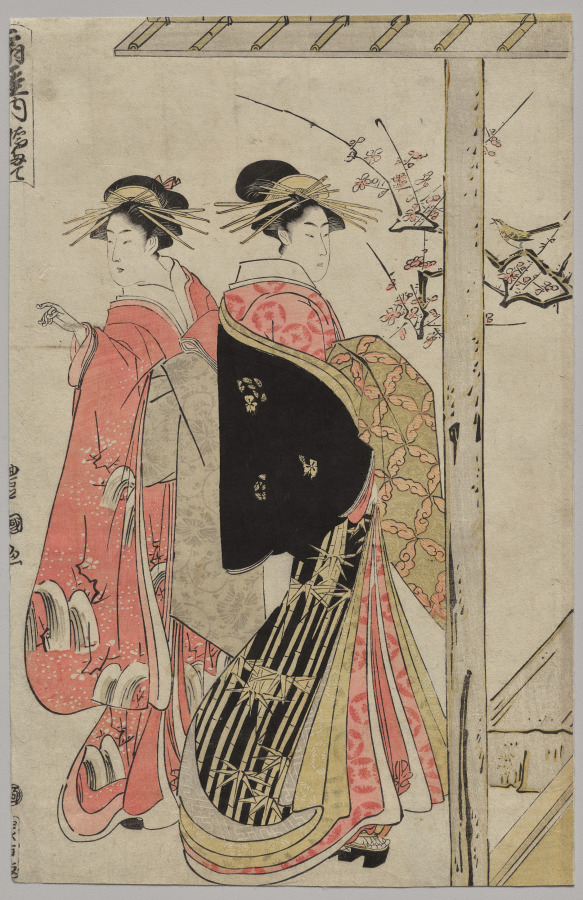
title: Courtesans of the Ōgiya on a Spring Outing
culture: Japan, Edo period (1615–1868)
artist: Utagawa Toyokuni (Japanese, 1769–1825)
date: mid- or late 1790s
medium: One of a triptych of woodblock prints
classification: Print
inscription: Signature: Toyokuni ga Publisher: Izumiya Ichibei (Senichi han) Censorship Seal: kiwame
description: In these prints, two courtesans of the Ōgiya brothel are entering an open pavilion, while another group gathers around a Japanese hibachi inside. Hanaōgi, the most celebrated courtesan of Ōgiya in the late 1700s, is depicted at a desk. Holding a brush in her hand, she turns her head to one side as if gathering her thoughts before writing in the book before her. Both her position and her loosened hair separate Hanaōgi from her courtesan companions who wear elaborate coiffures. This depiction of her captures both her knowledge of poetry and her skill as a calligrapher.